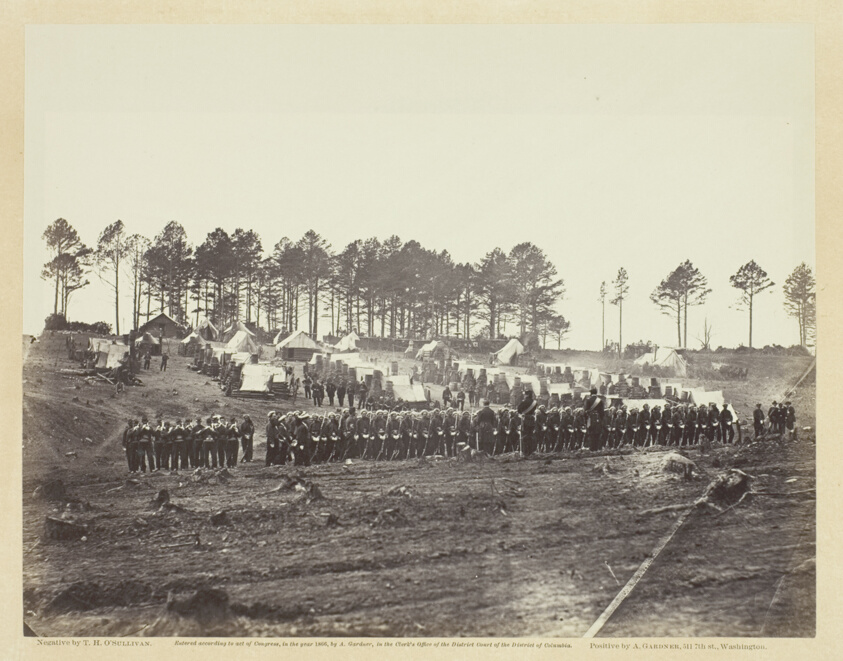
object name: Photograph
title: Guard Mount, Head-Quarters Army of the Potomac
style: 19th century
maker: Timothy O'Sullivan (American, born Ireland, 1840–1882)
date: February 1864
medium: Albumen print, pl. 55 from the album "Gardner's Photographic Sketch Book of the War, Volume II" (1866)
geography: United States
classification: photograph; albumen silver print; photography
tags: Collected by Hugh Edwards, Gardner's Photographic Sketch Book